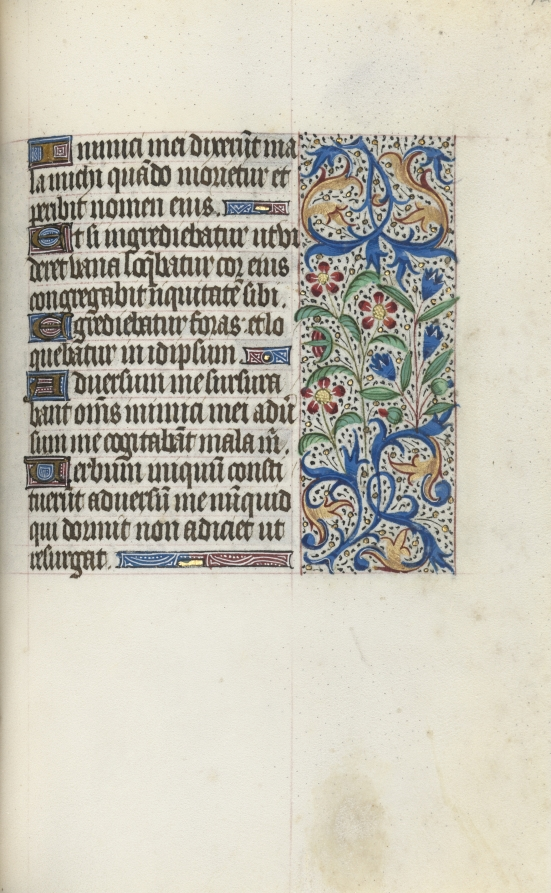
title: Book of Hours (Use of Rouen): fol. 128r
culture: France, Rouen, 15th century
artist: Master of the Geneva Latini (French, active Rouen, 1460–80)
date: c. 1470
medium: ink, tempera, and gold on vellum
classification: Bound Volume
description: In the late 1400s and early 1500s Rouen was an established and important center of book production. The city’s cathedral had a wealthy chapter that spent large sums of money to commission books and to maintain its extensive library. The stationers and booksellers would have likely been concentrated in or near the cathedral precinct. This artist, named after a manuscript now in Geneva, was Rouen’s principal illuminator during the second half of the 1400s.